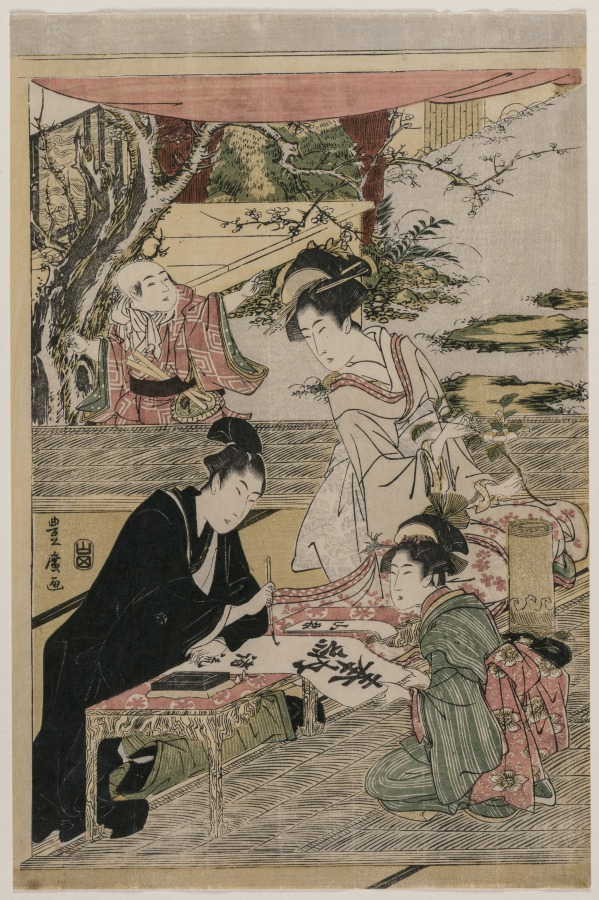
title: Young Man Writing at a Table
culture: Japan, Edo period (1615–1868)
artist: Utagawa Toyohiro (Japanese, 1733–1828)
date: c. 1800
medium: color woodblock print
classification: Print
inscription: Signature: Toyohiro ga Publisher: Yamadaya (Yamada)